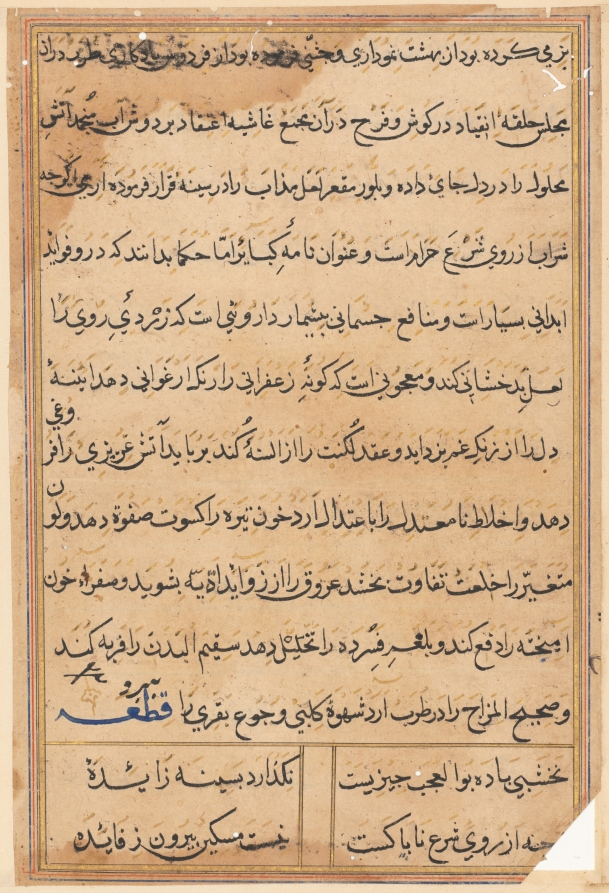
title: Page from Tales of a Parrot (Tuti-nama): text page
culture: Mughal India, court of Akbar (reigned 1556–1605)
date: c. 1560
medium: gum tempera, ink, and gold on paper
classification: Painting